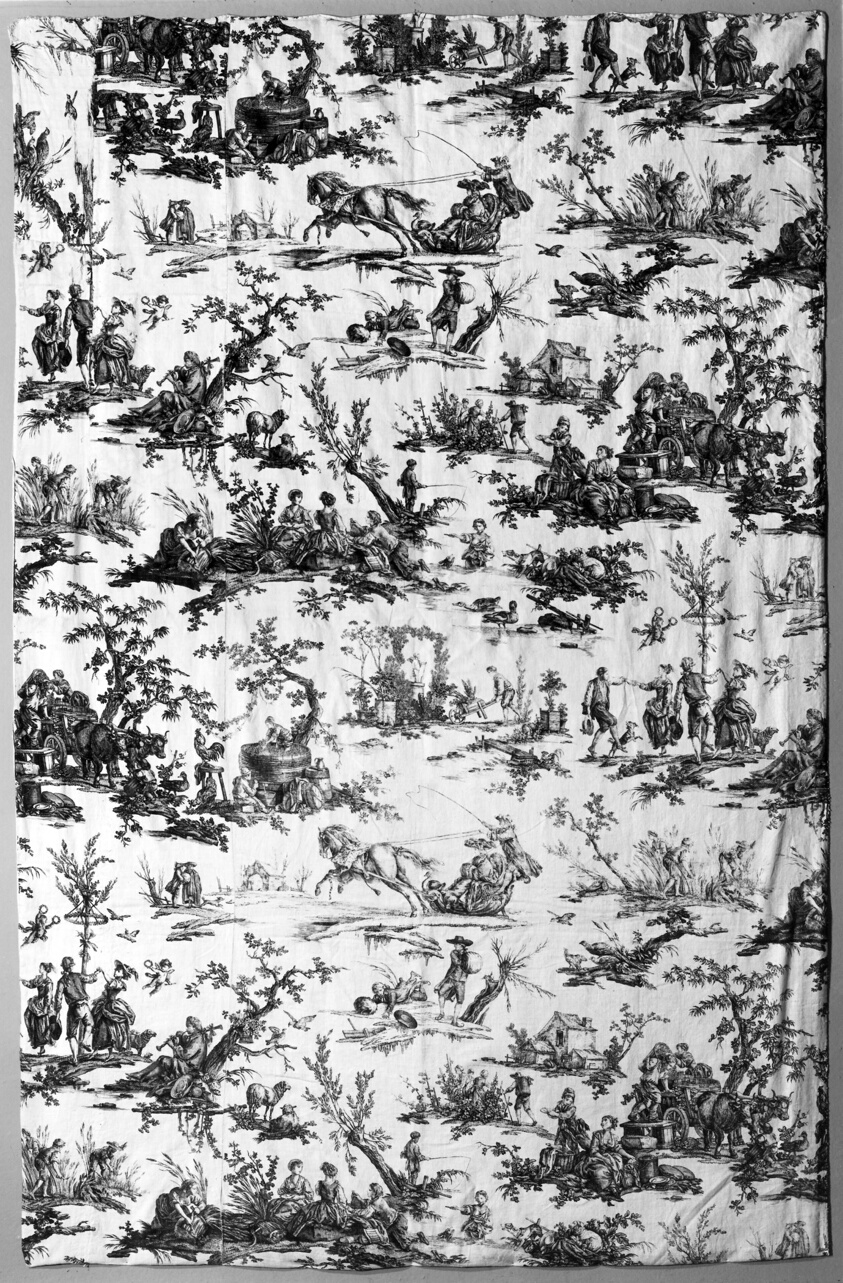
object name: Textile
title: Les Plaisirs des Quatre Saisons (Pleasures of the Four Seasons) (Furnishing Fabric)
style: jouy-en-Josas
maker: Designed by Jean Baptiste Huet (French, 1745–1811)) after Jacques Stella (French, 1596–1657) and Claudine Stella (French, 1636–1697); Manufactured by Christophe-Philippe Oberkampf (naturalized French, 1738-1815), Oberkampf Manufactory (French, 1760-1843); Jouy-en-Josas, France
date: c. 1785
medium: Cotton, plain weave; copperplate printed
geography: Jouy-en-Josas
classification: textile; weaving - printed; furnishing textile